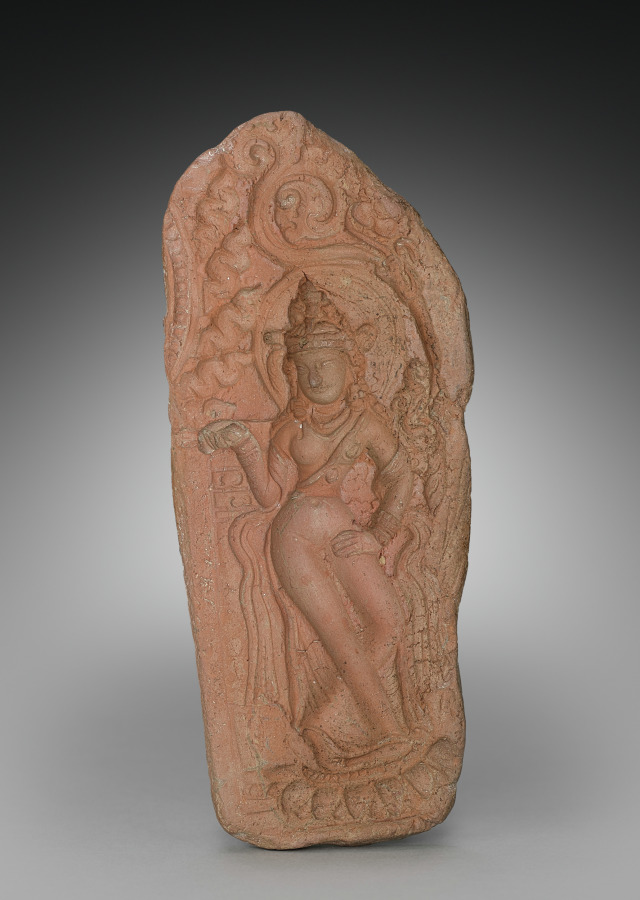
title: Mould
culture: India, Kashmir, 8th-9th Century (?)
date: 700s-800s(?)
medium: terracotta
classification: Ceramic